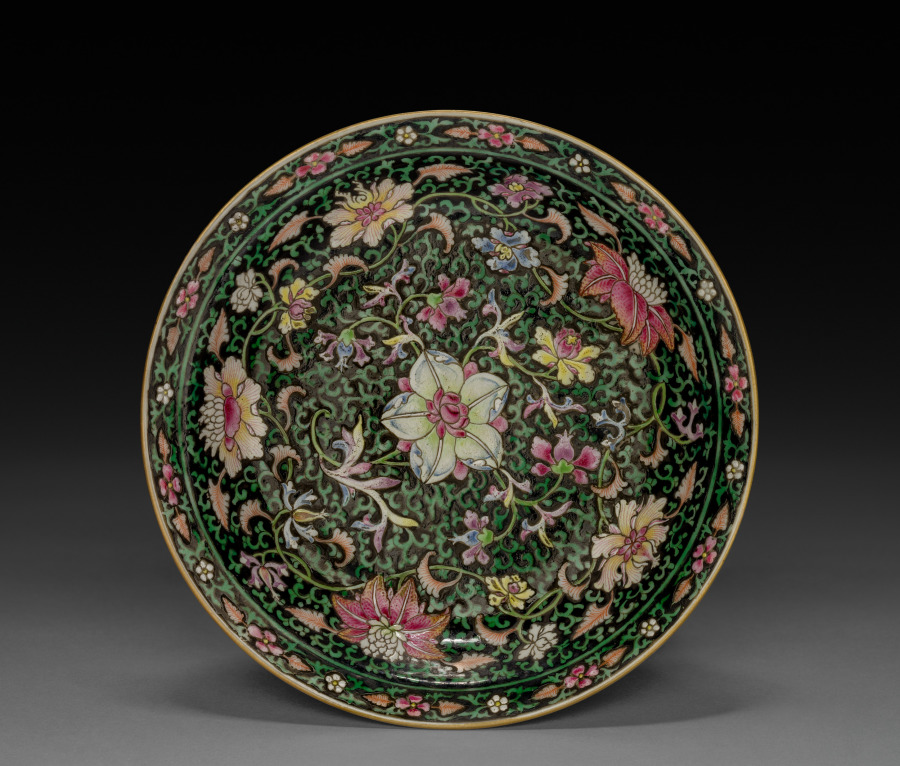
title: Dish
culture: China, Qing dynasty (1644–1911), Qianlong reign (1736–95)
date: 1736–95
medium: porcelain with famille rose overglaze enamel decoration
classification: Ceramic